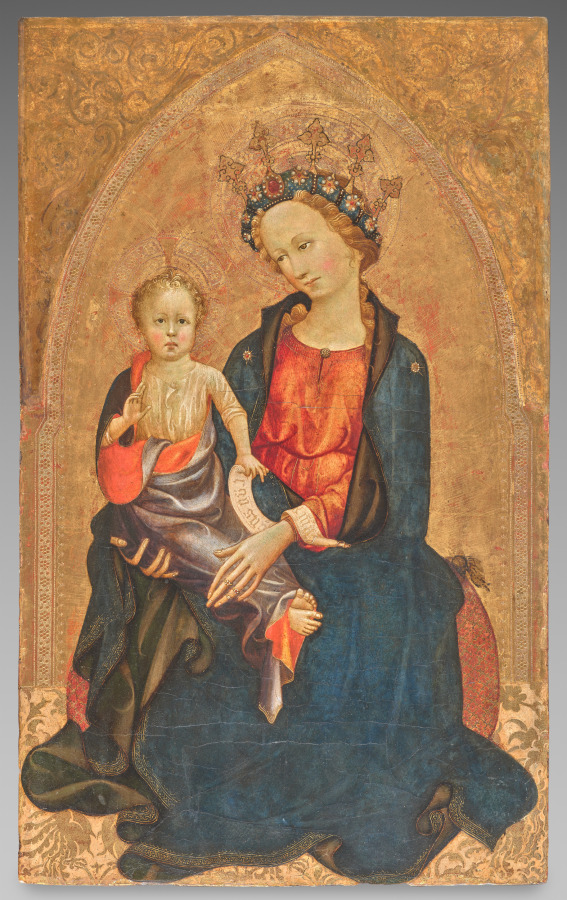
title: Madonna and Child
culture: Italy, Florence, active in Spain, late 14th-early 15th century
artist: Gherardo Starnina (Italian, c. 1360–before 1413)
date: c. 1400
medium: oil and gilding on wood panel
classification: Painting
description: Although Gherardo Starnina is regarded as one of the most important painters of his time in Florence, little is known about him. He probably studied with a well-regarded Florentine painter who made numerous frescoes. He is claimed to have participated in the painting of the frescoes in the Castellani Chapel in Santa Croce, Florence. Documents show that he worked extensively in Spain, specifically Toledo and Valencia, executing many panel paintings and frescoes there. Most of his known paintings are altarpieces, often illustrating scenes from the lives of the saints. Stylistically, Starnina drew from many sources, including the Late Gothic style he witnessed while in Spain, and he developed a uniquely independent, progressive manner. The lyrical grace of this Madonna and her Valencian-style crown owe much to his experience in Spain.